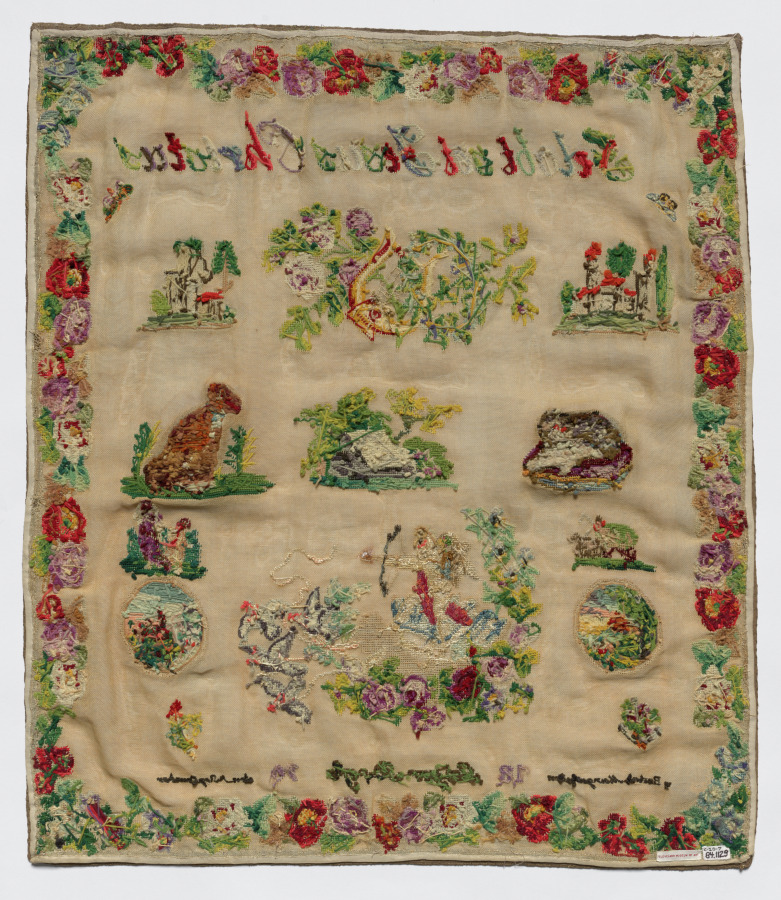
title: Sampler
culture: Germany, 19th century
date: 1870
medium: embroidery; wool on woolen canvas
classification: Sampler